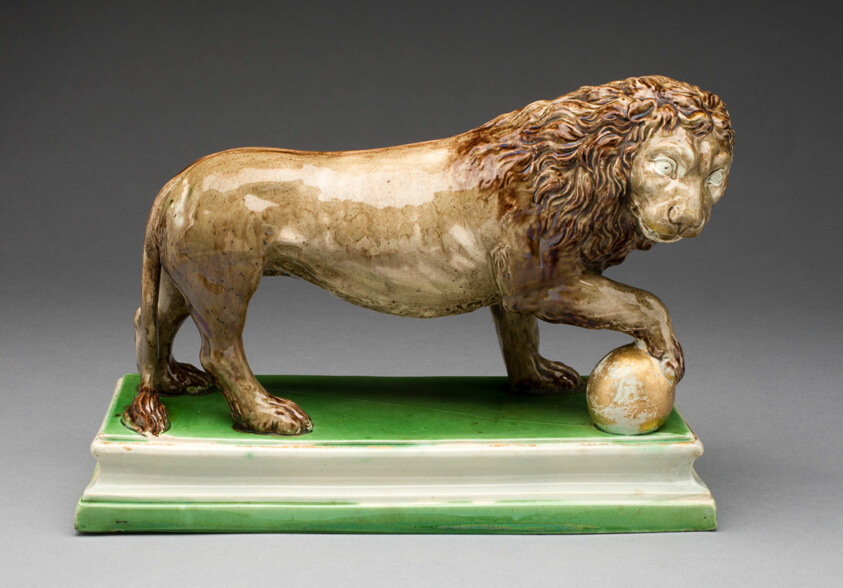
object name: Ceramics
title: Lion (One of a Pair)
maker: England, Staffordshire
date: c. 1785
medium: Lead-glazed earthenware (pearlware)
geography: Staffordshire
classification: earthenware; pearlware; ceramics; european decorative arts; lead-glazed earthenware